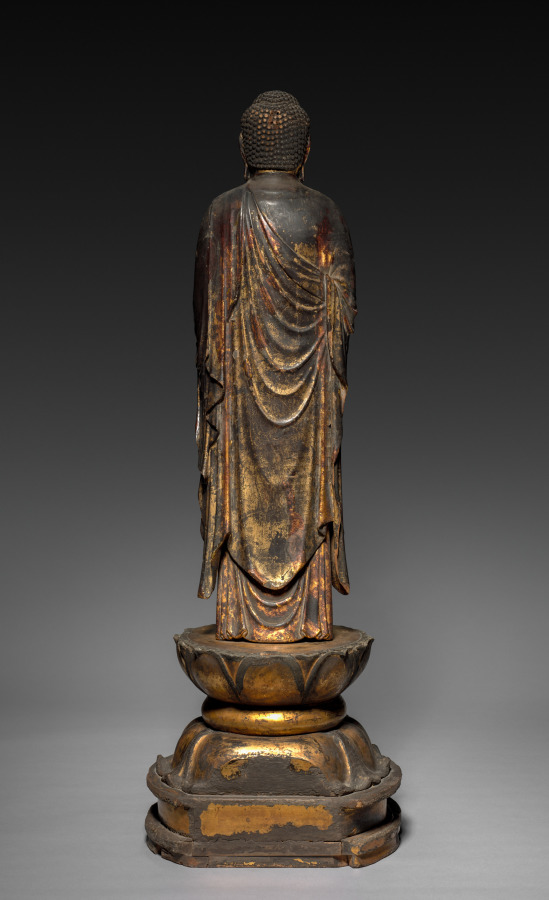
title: Amida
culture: Japan, Kamakura period (1185–1333)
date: 1200s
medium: Wood with lacquer and gilding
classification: Sculpture